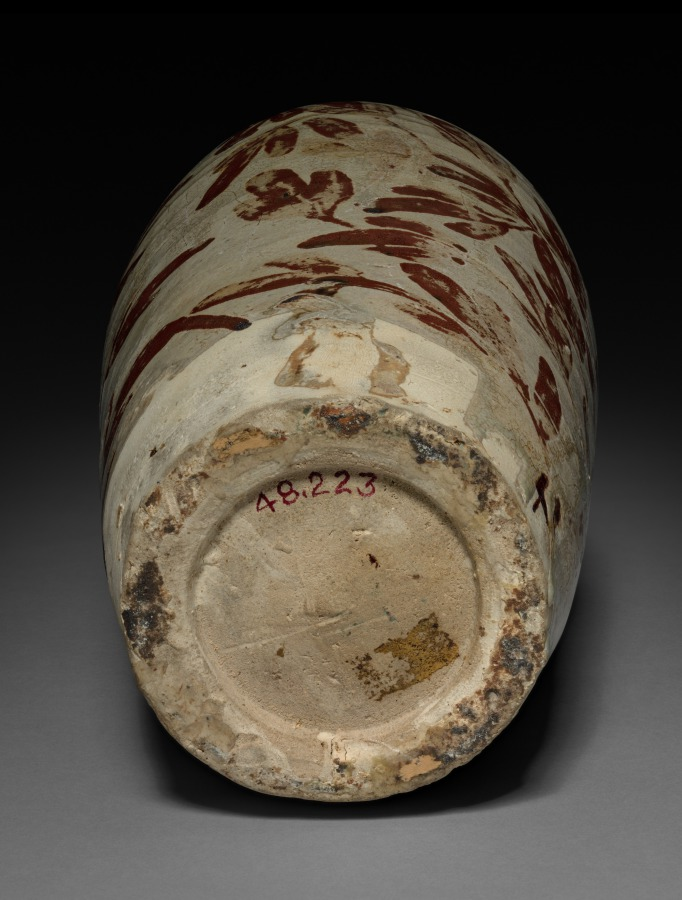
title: Vase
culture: China, Northern Song dynasty (960–1127)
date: 1100s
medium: Buff stoneware with underglaze slip coating, Cizhou ware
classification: Ceramic